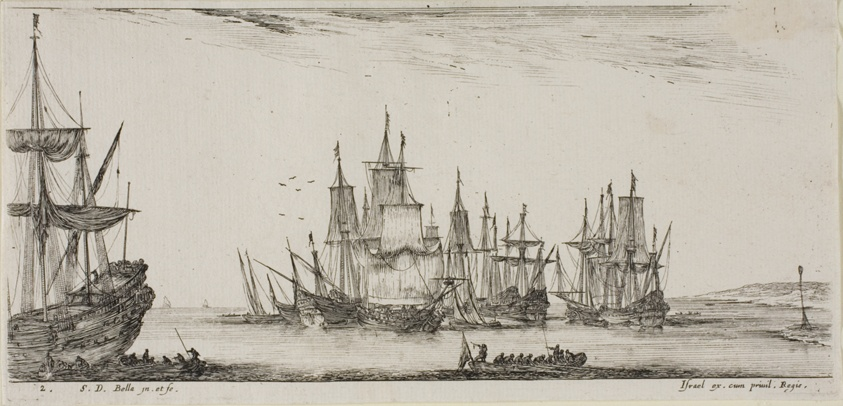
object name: Print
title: Plate Two from Various Embarkments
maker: Stefano della Bella (Italian, 1610-1664)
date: c. 1640/50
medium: Etching on ivory laid paper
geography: Italy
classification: etching; paper; print; prints and drawing